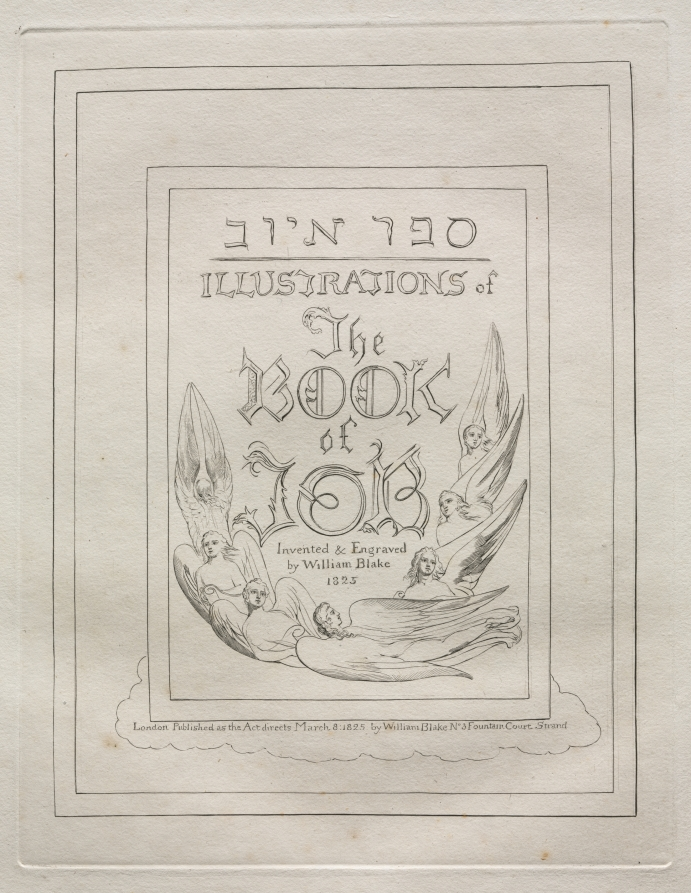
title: The Book of Job: Title Page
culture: England, 18th century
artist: William Blake (British, 1757–1827)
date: 1825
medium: engraving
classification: Portfolio